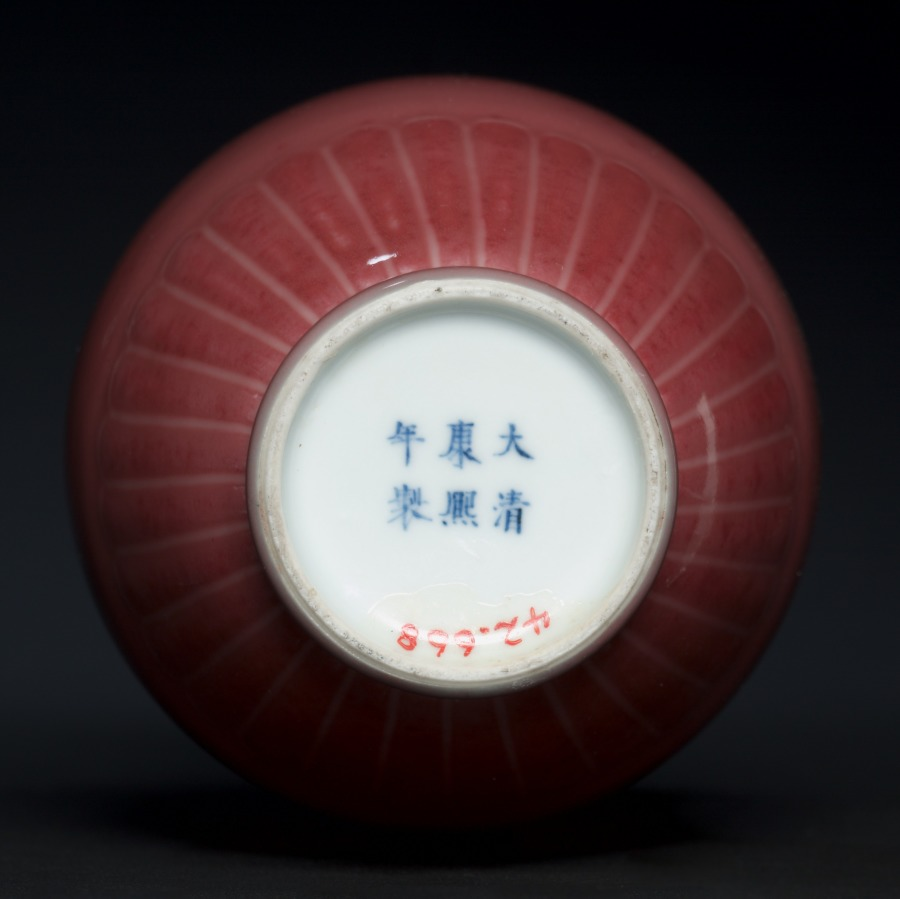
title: Lotus Petal Vase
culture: China, Jiangxi province, Jingdezhen, Qing dynasty (1644-1911), Kangxi period (1662-1722)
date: 1662–1722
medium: porcelain with "peach bloom" glaze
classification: Ceramic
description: The "peach-bloom" glaze developed during the Kangxi era has also been described as "drunken with beauty." Technical achievements were transcended with aesthetic associations, revealing the greatest sensitivity to all things beautiful in nature.